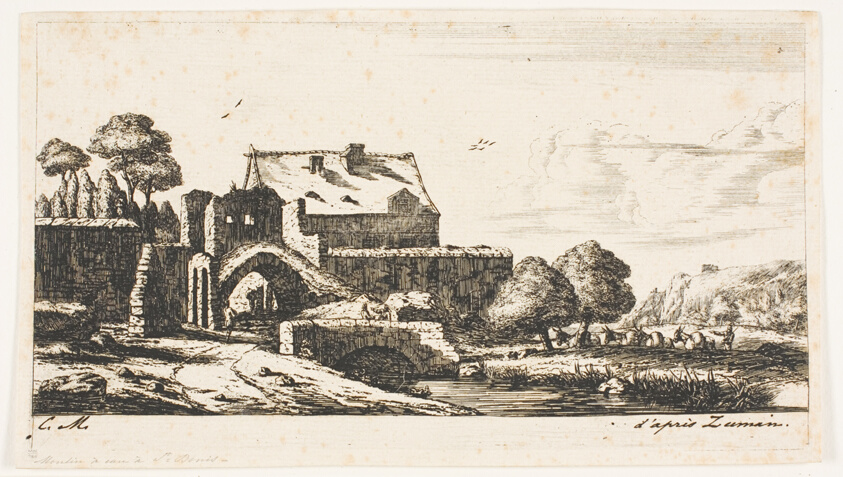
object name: Print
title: A Water-Mill Near Saint-Denis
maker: Charles Meryon (French, 1821-1868); after Reinier Nooms (Dutch, c. 1623-c. 1664)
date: 1850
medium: Etching, engraving and roulette on ivory laid paper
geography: France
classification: etching; print; prints and drawing